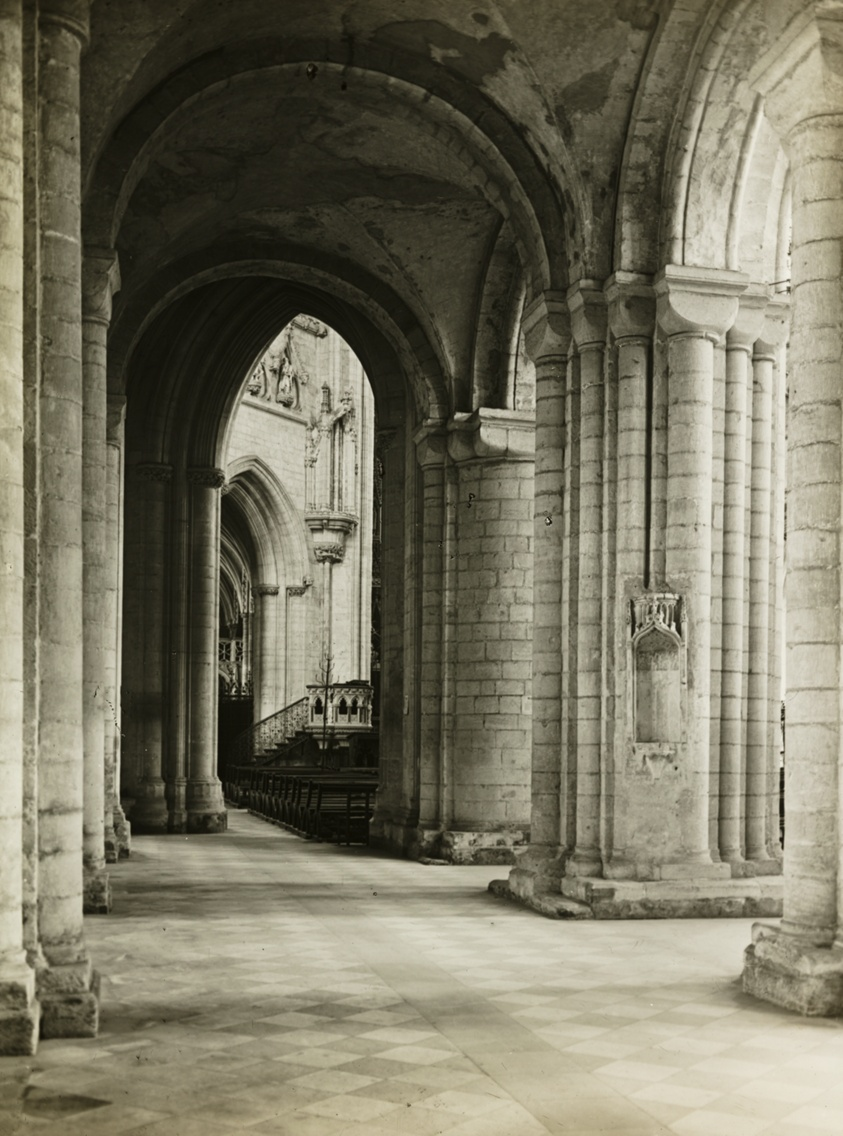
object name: Photograph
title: Ely Cathedral: North Aisle to East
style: Pictorialism, 19th century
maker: Frederick H. Evans (English, 1853–1943)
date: 1891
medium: Lantern slide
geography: England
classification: photograph; photography